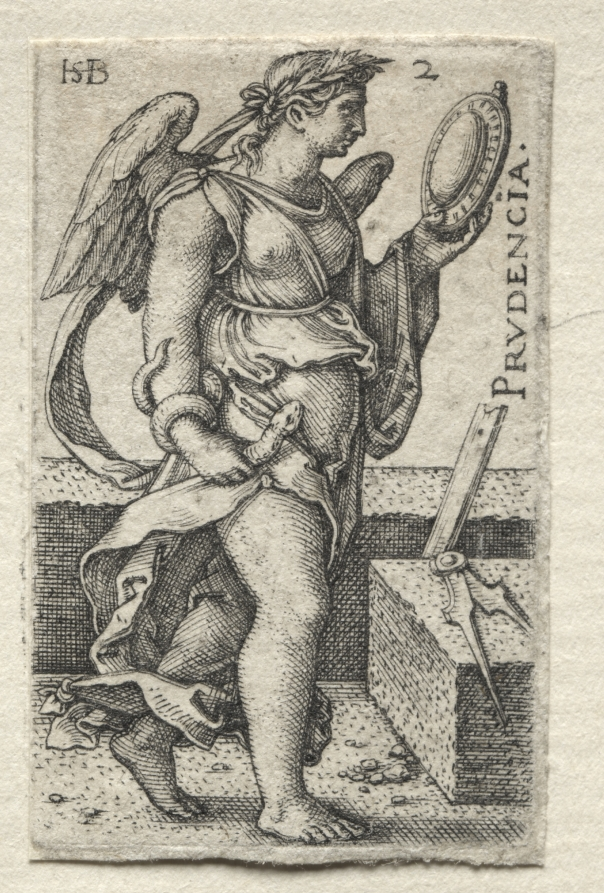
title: The Knowledge of God and the Seven Cardinal Virtues: Prudence - Prudencia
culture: Germany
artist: Hans Sebald Beham (German, 1500–1550)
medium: engraving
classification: Print